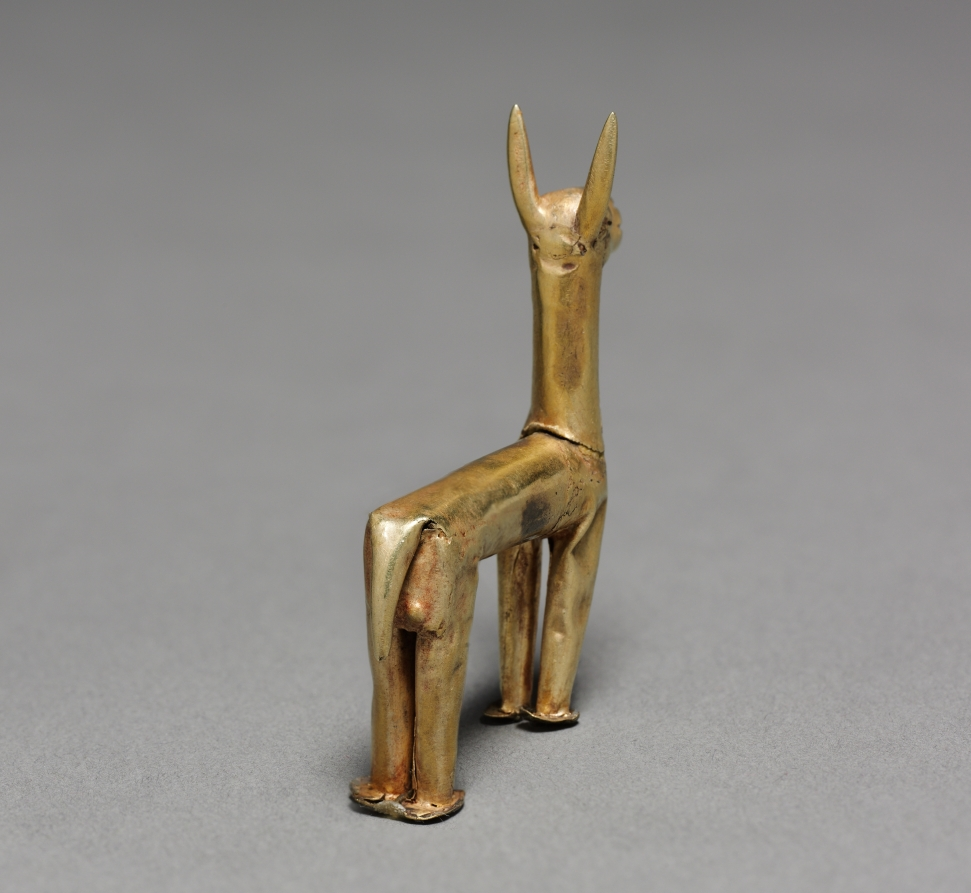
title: Llama Figurine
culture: Peru, Bolivia, Chile or Ecuador, Inka style (1400-1532)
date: 1400–1532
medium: hammered gold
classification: Metalwork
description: Precious metal was a major Inka artistic medium, but most was melted down after the conquest to fund the Spanish court. The sole remains are small-scale objects from tombs and offerings. Figurines in gold, like this one, have been found at shrines on sacred mountain peaks, where they accompanied child sacrifices in offerings made during times of crisis, such as famine.